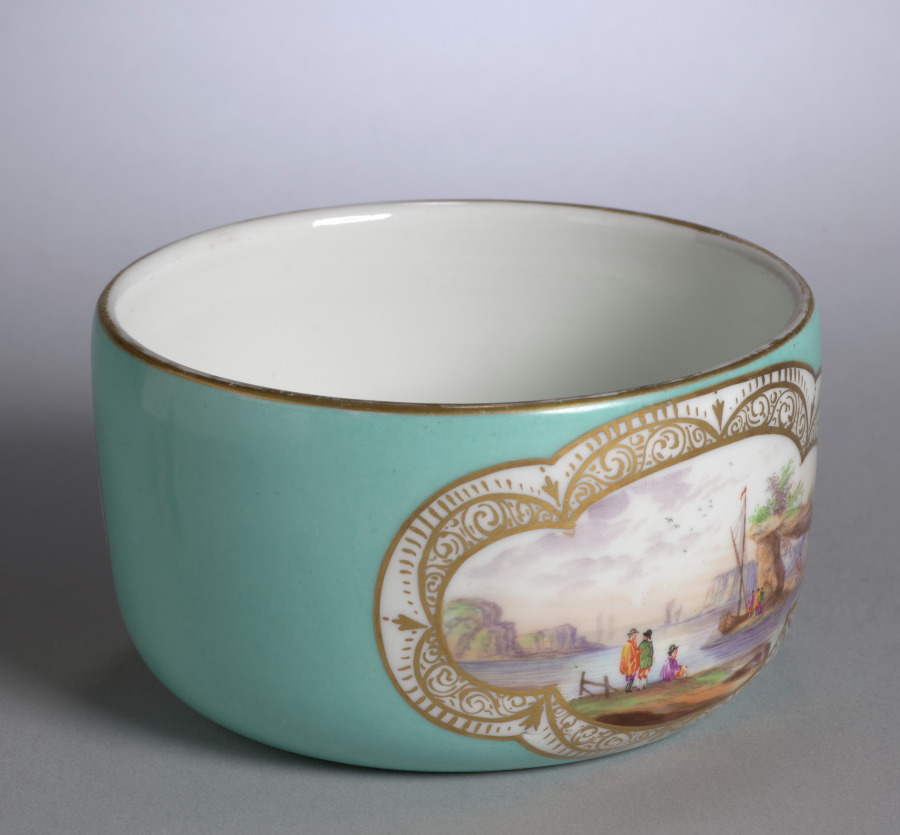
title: Bowl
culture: Germany, Meissen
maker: Meissen Porcelain Factory (German, est. c. 1710)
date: c. 1750–70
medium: porcelain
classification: Ceramic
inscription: Half moon mark on the bottom.